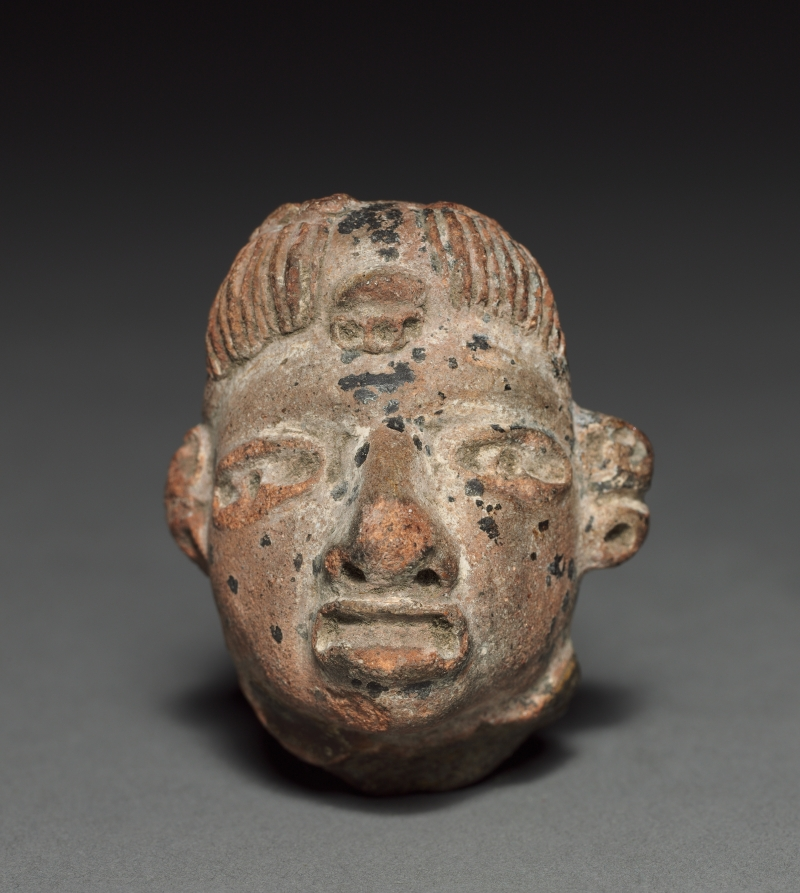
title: Figurine Head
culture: Mexico or Central America, Maya(?)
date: 100 BCE–300 CE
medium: pottery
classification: Sculpture